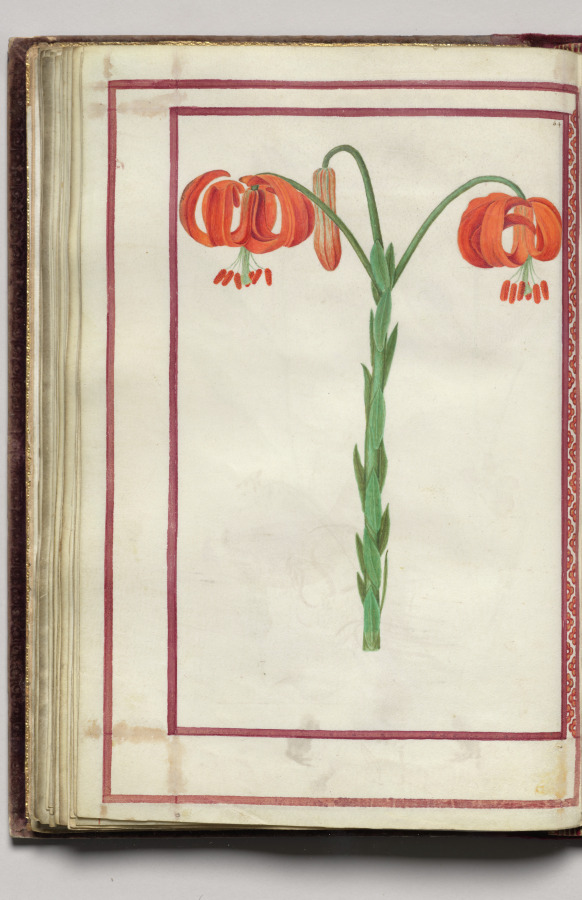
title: Turks Cap Lily, folio 32 (verso), from Florilegium (A Book of Flower Studies)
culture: France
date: 1608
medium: watercolor, ink, silver, and gold over occasional traces of pencil, on vellum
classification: Bound Volume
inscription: Dated: Poitiers 1608 (on frontispiece) Signed: On frontispiece in black ink, lower right: Van Kuyk Notation on drawing: Frontispiece: in pencil, lower margin: * élève de Van Kessel, peintre flammand (* in pencil also appears in front of Van Kuyk's name).